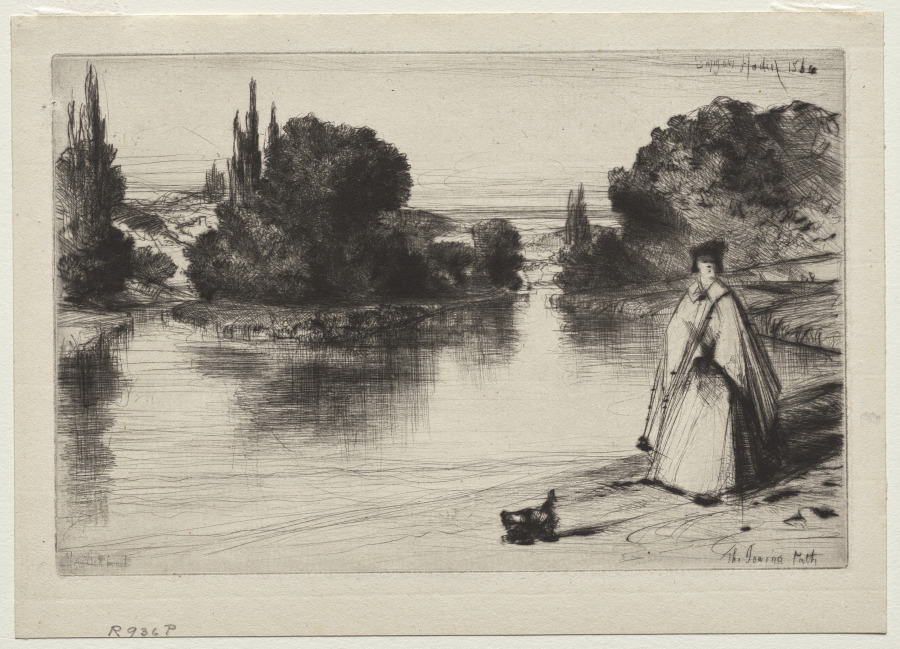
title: The Towing Path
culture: England, 19th century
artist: Francis Seymour Haden (British, 1818–1910)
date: 1864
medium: drypoint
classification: Print